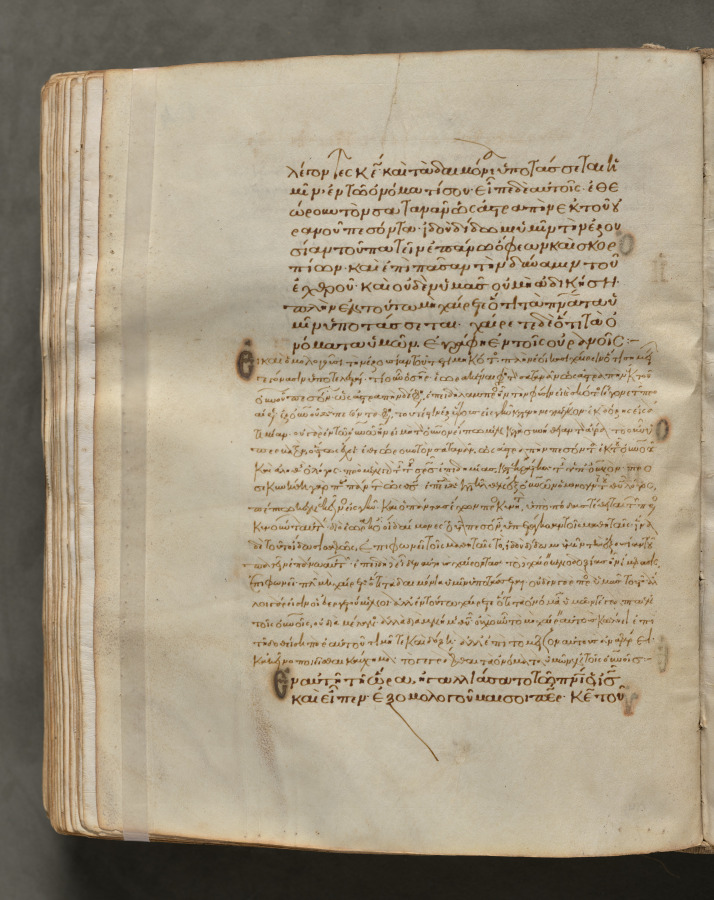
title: Text, folio 254 (verso), from a Gospel Book with Commentaries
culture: Byzantium, Constantinople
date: c. 1000–1100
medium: ink, tempera, and gold on vellum; leather binding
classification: Bound Volume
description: Each of the four gospels in this book opens on a page with brilliantly illuminated borders depicting the author of the text as well as birds—principally peacocks, symbols of the immortality of the soul—and fountains, representing the fountain of life and the salvation of the soul. This volume consists of 428 leaves with texts in Greek. Its level of sophistication suggests that it was probably written and decorated in a monastery in Constantinople.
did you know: Gospel books were carried in procession through Byzantine churches.